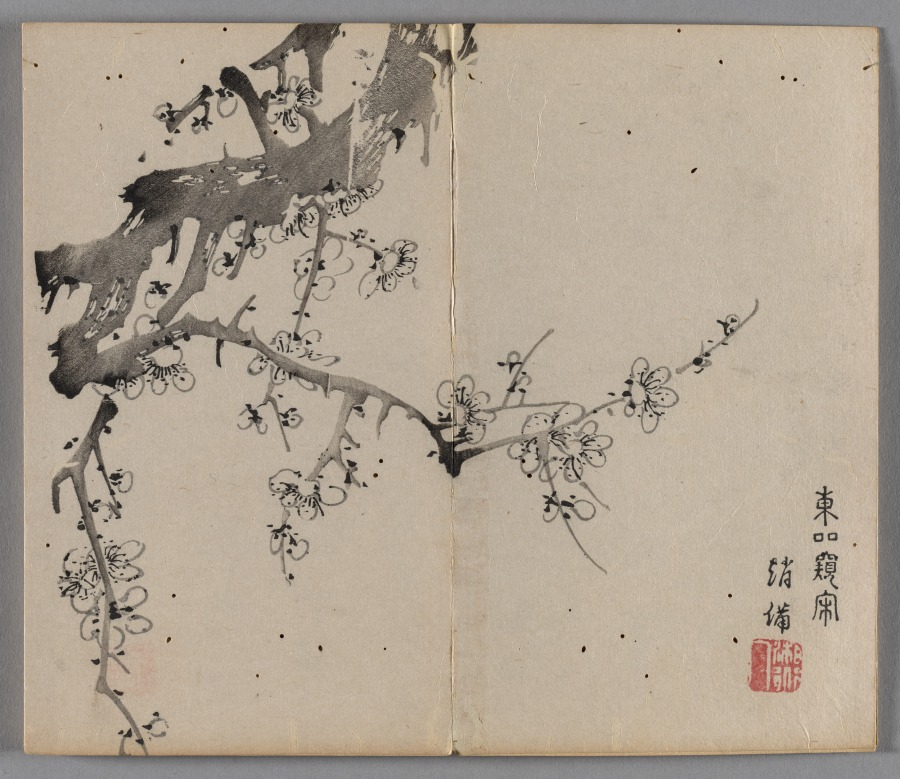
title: Ten Bamboo Studio Painting and Calligraphy Handbook (Shizhuzhai shuhua pu): Plum Blossoms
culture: China, Qing dynasty (1644-1911)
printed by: Hu Zhengyan (Chinese, c. 1584–1674)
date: 1633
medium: Woodblock-printed book; ink and colors on paper; first edition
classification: Print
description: Color printing reached a level of perfection in the early 1600s, as seen in this Ten Bamboo Studio Collection of Calligraphy and Painting and the Mustard Seed Garden Manual of Painting (printed 1679 and 1701). The painterly quality, precision in registering (aligning) the woodblocks, and harmonious colors made them the most successful color print editions in Chinese history. Both editions were printed and compiled in Nanjing, spread nationwide, and had a great impact on the arts in Japan and Korea.